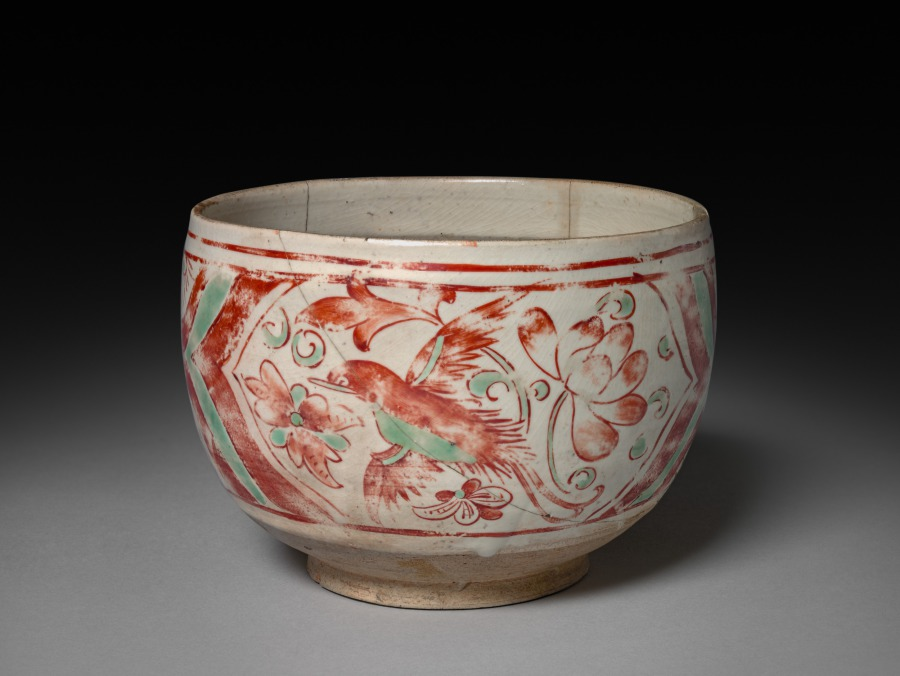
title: Bowl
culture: China, Jin dynasty (1115-1234) - Yuan dynasty (1271-1368)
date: 1200s–1300s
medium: buff stoneware with underglaze slip application and overglaze enamel decoration; Cizhou ware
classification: Ceramic